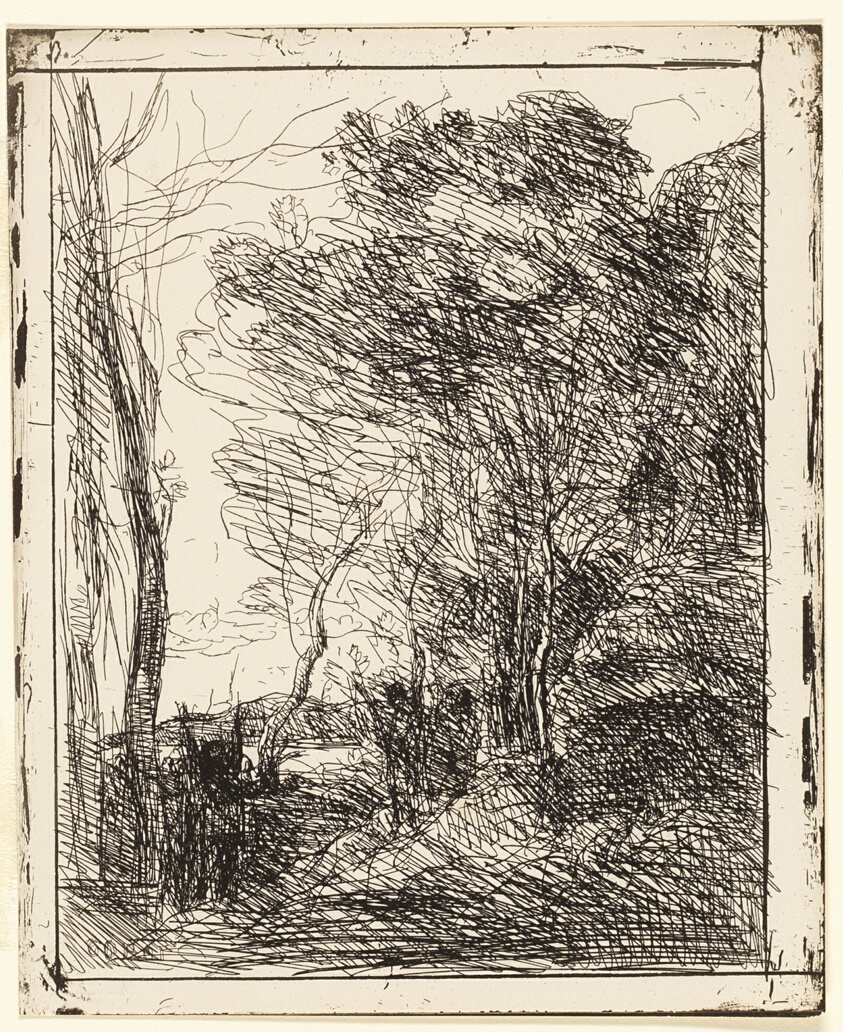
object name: Print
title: The Gallic Clearing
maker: Jean-Baptiste-Camille Corot; French, 1796-1875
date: 1857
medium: Cliché-verre on ivory photographic paper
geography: France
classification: cliché-verre; print; prints and drawing